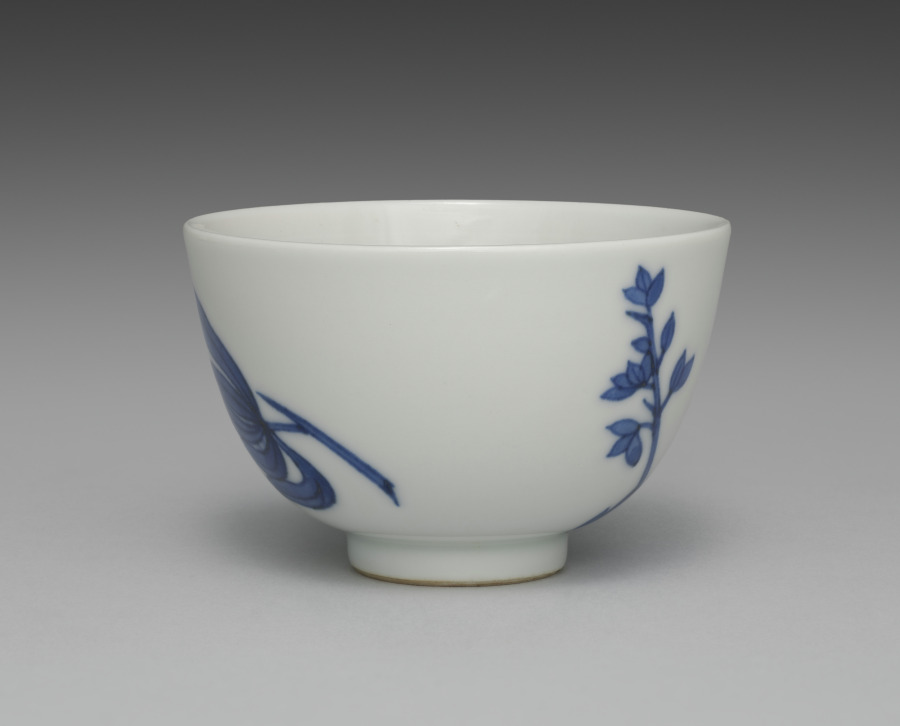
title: Teacup from Tea Set with Orchids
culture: Japan, Meiji period (1868–1912)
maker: Seifū Yohei III (Japanese, 1851–1914)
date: c. 1893–1914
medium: Porcelain with underglaze blue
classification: Ceramic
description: Although the teapot here is stored in a separate box from the five cups, these six pieces may once have been part of a tea set that included other tools such as a water cooler. The teacups have orchid flowers on both sides in underglaze blue, as well as a blue band inside the footring. The teapot has the same design and a blue band painted around the bottom of the lid’s knob. The cups’ long wood storage box is stamped on the exterior, over the lid and base, with a small red seal reading “Satō.” The same seal appears on five small squares of yellow textile, one placed in the bottom of each compartment in the teacup storage box. These are additional to the customary yellow cloths stamped with a “Seifu” seal. Interestingly, four of the Seifū cloths are stamped with an ovoid seal, while the remaining cloth, which is a slightly lighter color, has an unusual seal that is not quite gourd-shaped and with the fū of Seifū in a stylized, unrecognizable form. The teapot has its own box with a Satō seal and is wrapped with an orange textile stamped with the same unusual Seifū seal. A set with a very similar surface design is in the Brooklyn Museum. The Brooklyn set has a water cooler and a small pitcher, in addition to the teapot and cups, and all are in a single storage box. This box records the tea tools as made with kanpakuji, or “bright-jewel white porcelain,” counted among Yohei III’s most important inventions, and carved images. In fact, both sets have a white surface much closer in coloration to the cool white of porcelain clay used in Kyoto at the time, and the designs are simply painted. The Brooklyn set was thus likely mismatched at some point with a box intended for another tea set. Nonetheless, the box may have helped prevent the set’s original components from being dispersed, and the set itself provides insight into how the other tools from the present set may have looked.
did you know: This tea set with orchids has a side-handled pot called a kyūsu, used for steeping, straining, and serving tea.